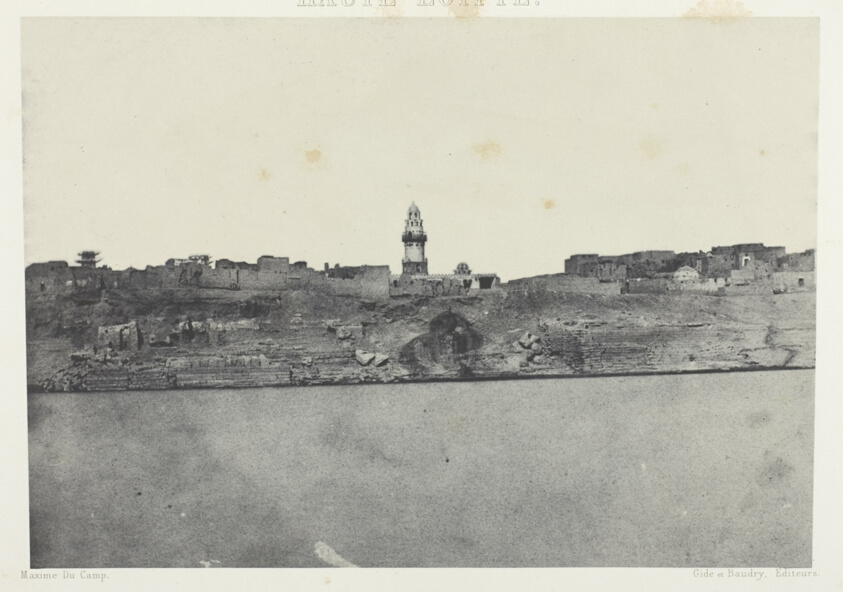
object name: Photograph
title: Vue Générale d'Esneh, Haute-Egypte, plate 64 from the album "Egypte, Nubie, Palestine et Syrie" (1852)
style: 19th century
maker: Maxime Du Camp (French, 1822–1894)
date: 1849/51, printed 1852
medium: Salted paper print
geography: France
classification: salted paper print; photographic process; photography; photograph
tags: Collected by Hugh Edwards, Egypte, Nubie, Palestine et Syrie